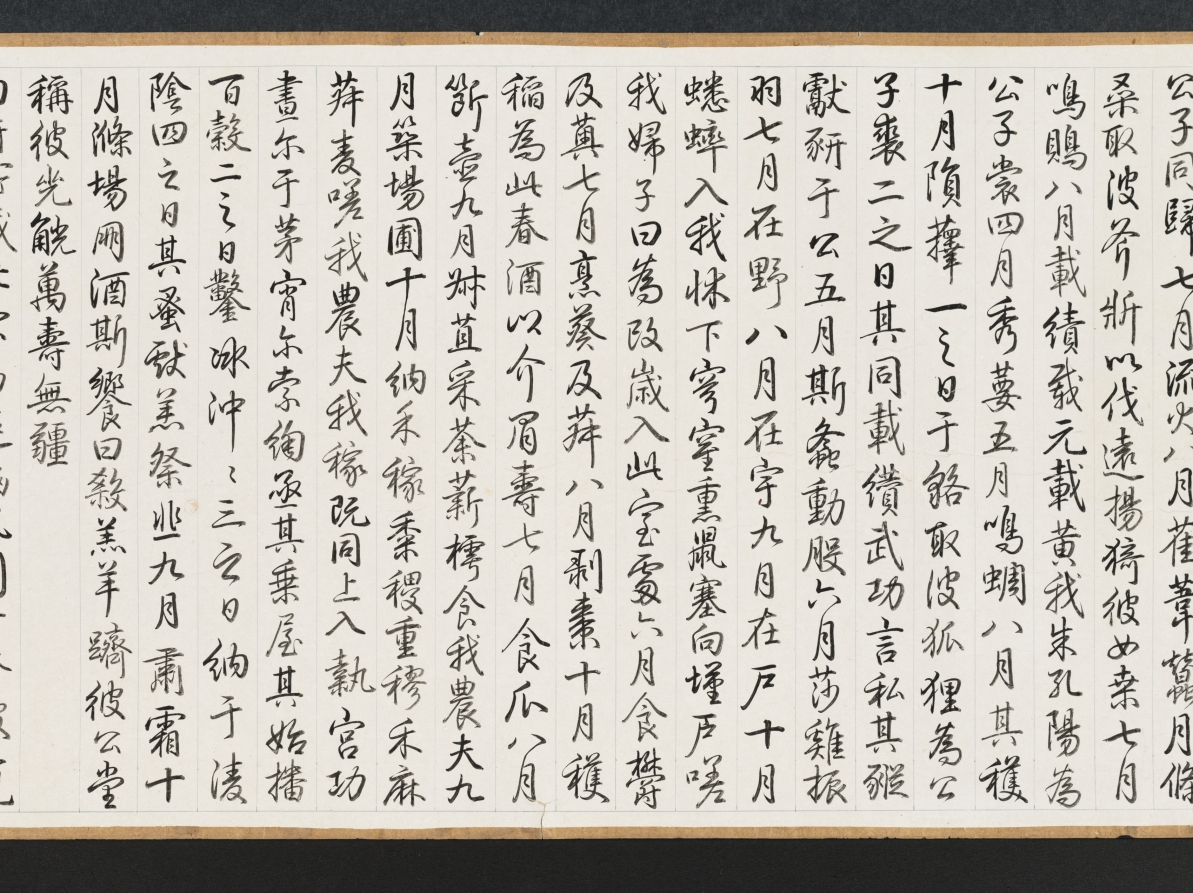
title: "Seventh Month" from the Odes of Bin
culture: China, Southern Song dynasty (1127-1279)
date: 1200s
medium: Handscroll; ink and color on silk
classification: Painting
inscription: Colophons: 1. [on the frontispiece] by the Qianlong emperor (dated 1741). 2. by Lu Wan (dated Zhengde dingchou, 1517). 2. by the Jiaqing emperor (dated 1807).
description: According to Confucian thought, the ruler looks after the well-being of his people which involves agricultural activities. Seventh Month from the ancient Odes of Bin in the Shijing (Book of Poetry) describes occupations throughout the year, including plowing, harvesting, hunting, making clothes, and observing rituals. The earliest illustrations of these Odes accompanied by text were commissioned by Southern Song emperor Gaozong (reigned 1127–1162). As the lower Yangzi delta had become the new seat of government, Gaozong had sets of these illustrations produced by court artists to revive the dynasty and convince the Confucian officialelite of his legitimacy to rule.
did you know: The Odes of Bin appears in the classic Shijing (Book of Poetry), an anthology of more than 300 poems, folk songs, and ceremonial hymns that were originally chanted to music.